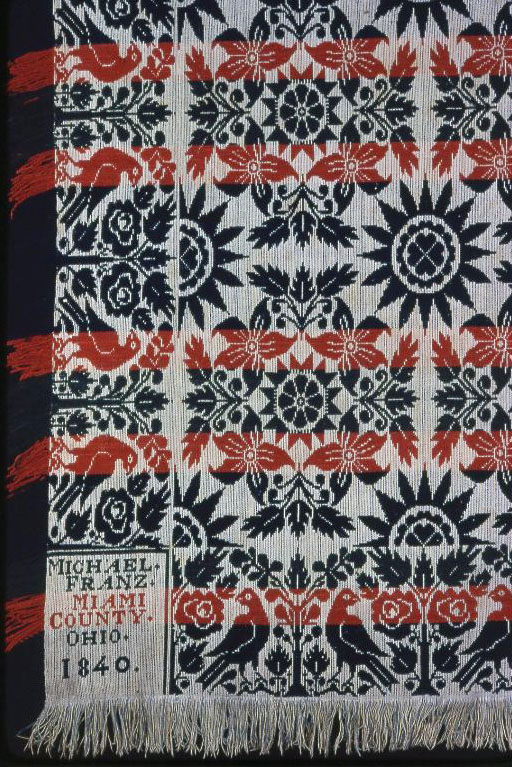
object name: Textile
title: Coverlet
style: 19th century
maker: Michael Franz (American, active c. 1839-1851); United States, Ohio, Miami County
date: 1840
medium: Cotton and wool, plain weave with plain interlacings of secondary binding warps and patterning wefts (Beiderwand); woven on loom with Jacquard attachment; two loom widths joined; fringed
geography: Ohio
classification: weaving - coverlet; coverlet; textile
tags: flowers, dates, birds, foliage, coverlet